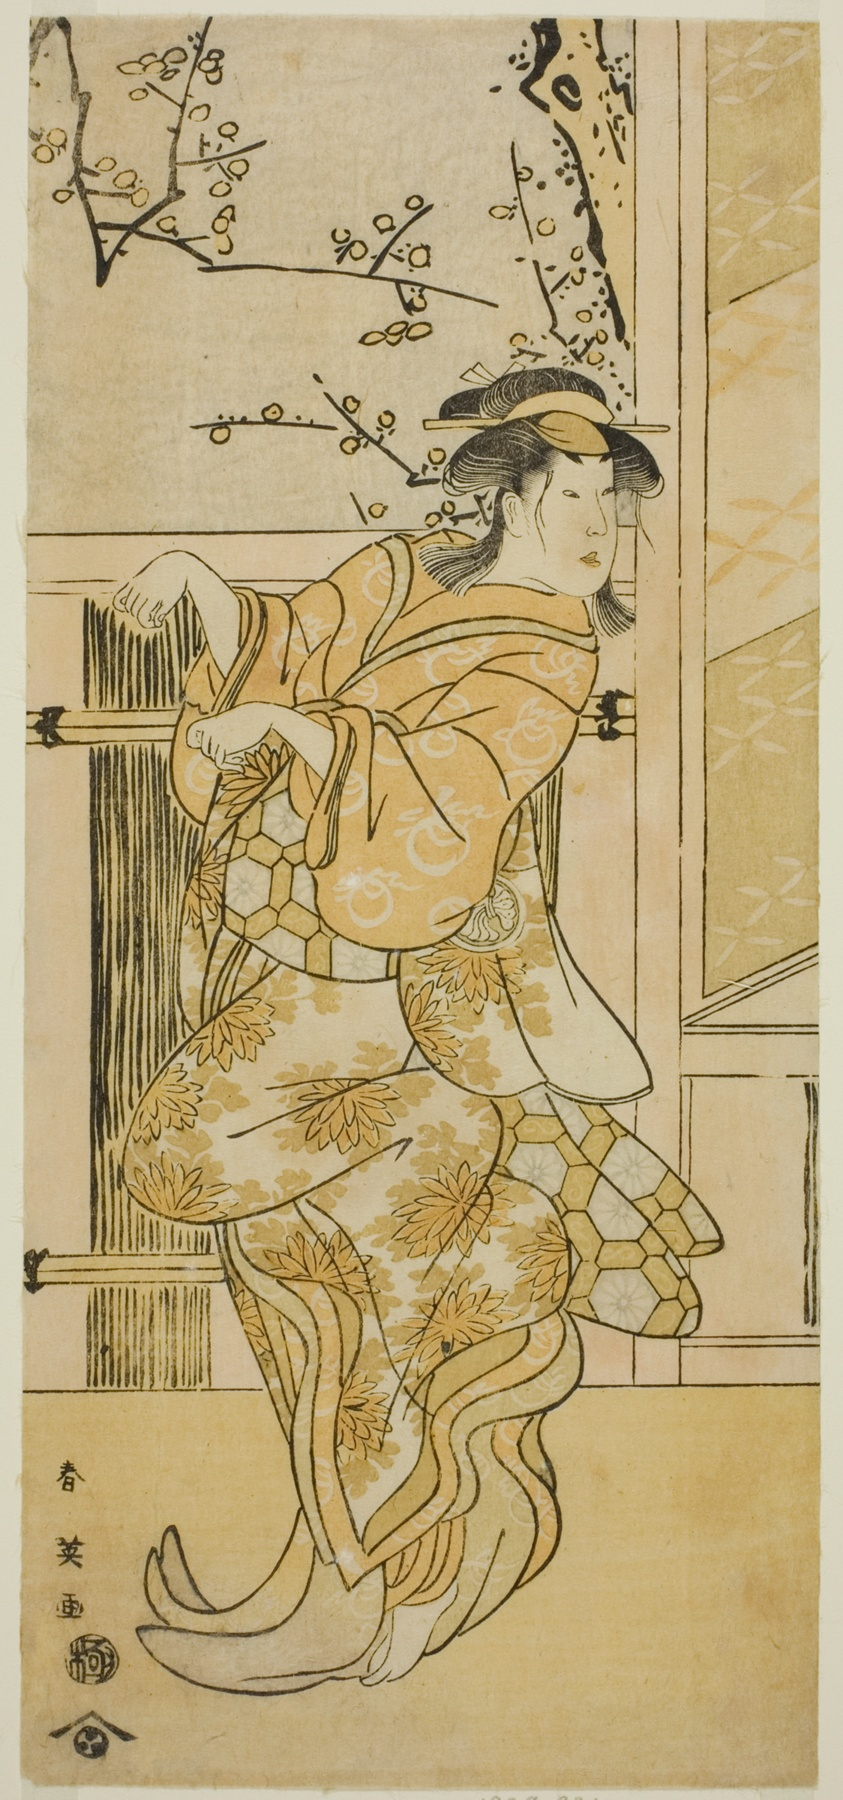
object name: Print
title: The Actor Segawa Kikunojo III as Kojoro-gitsune (Female Fox) Disguised as Omiki in the Play Komachi-mura Shibai no Shogatsu, Performed at the Nakamura Theater in the Eleventh Month, 1789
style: Japanese (culture or style)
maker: Katsukawa Shun'ei (Japanese, 1762-1819)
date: c. 1789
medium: Color woodblock print; hosoban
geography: Japan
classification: woodblock print; print; asian art